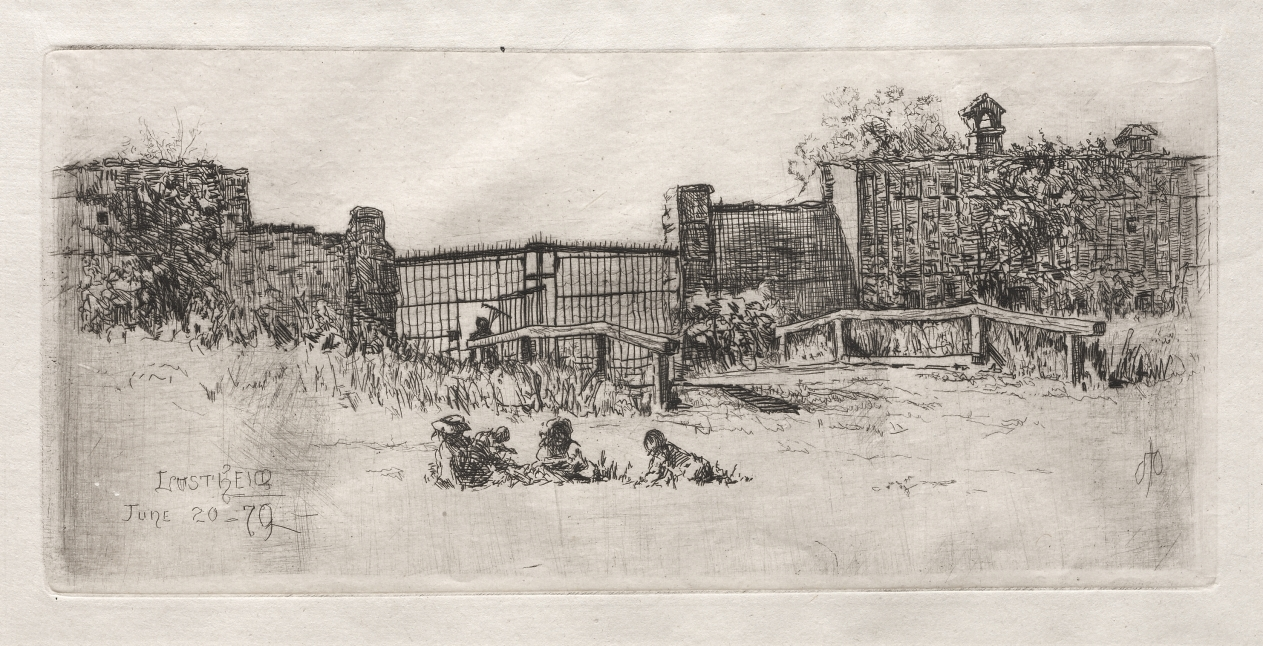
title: The Gate, Lustheim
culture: America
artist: Otto H. Bacher (American, 1856–1909)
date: 1879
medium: etching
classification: Print